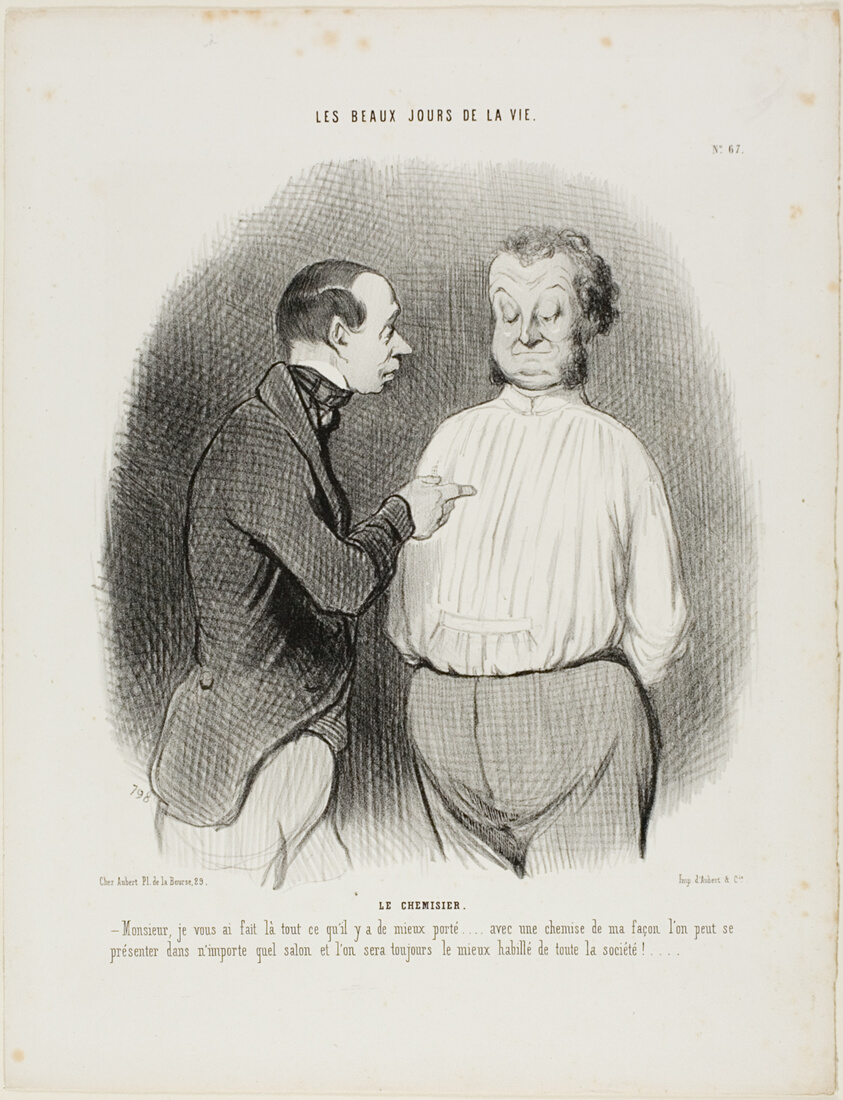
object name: Print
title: The Shirt Maker. “Sir, I have tailored here for you the best that is presently available..... with a shirt of my making one can present oneself in no matter what Salon and one will always be the best dressed man of the party,” plate 67 from Les Beaux Jours De La Vie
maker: Honoré Victorin Daumier; French, 1808-1879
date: 1845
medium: Lithograph in black on white wove paper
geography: France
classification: lithograph; print; prints and drawing